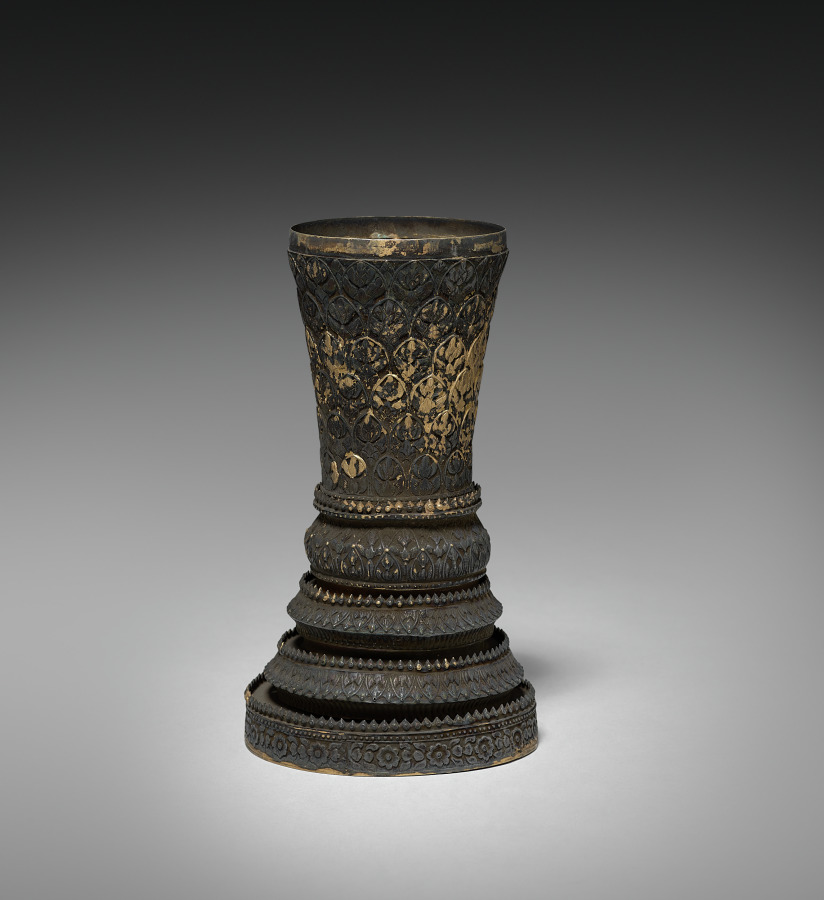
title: Burial Urn (base)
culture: Siam, 19th century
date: 1800s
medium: gold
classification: Metalwork